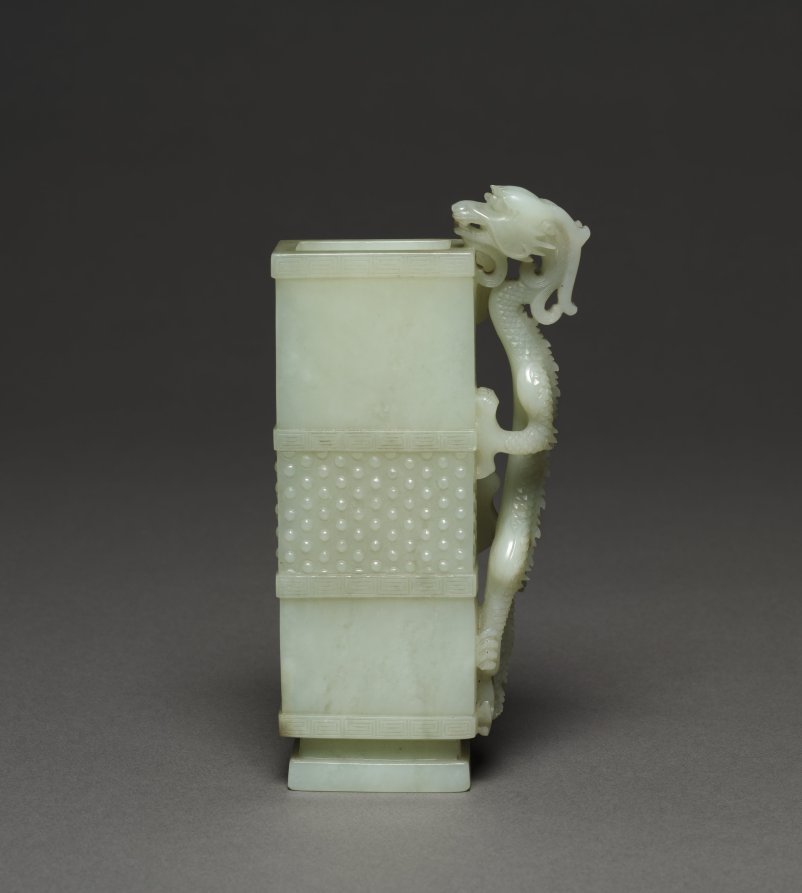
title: Rectangular Wine Cup (Zun) with Dragon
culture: China, Qing dynasty (1644–1911)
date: 1700s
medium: grayish-white jade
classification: Jade